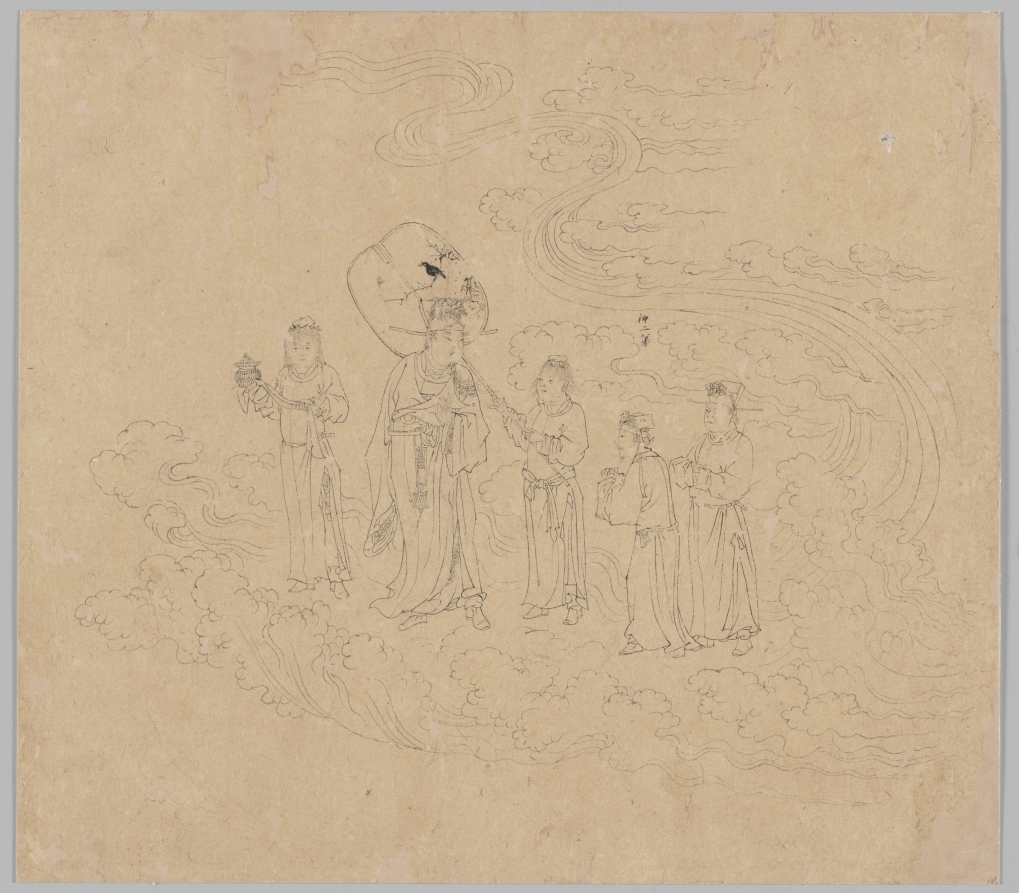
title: Album of Daoist and Buddhist Themes: Procession of Daoist Deities: Leaf 10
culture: China, Southern Song dynasty (1127-1279)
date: 1200s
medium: Album, ink on paper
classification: Painting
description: This extraordinary album has 50 paintings on a variety of religious subjects. They were likely created by several master craftsmen to share with studio apprentices as models for fulfilling commissions. The Jade Emperor and the Daoist pantheon make up the first 26 leaves. The next 14 leaves portray the Buddhist Ten Kings of Hell administering punishments to the dead. The third section, called “Clearing the Mountains,” features divine soldiers, led presumably by the deity Erlang Shen 二郎神, fighting undesirable creatures.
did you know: One of the divine lord's attendants is identified as "the second brother of the deity" 神二弟.